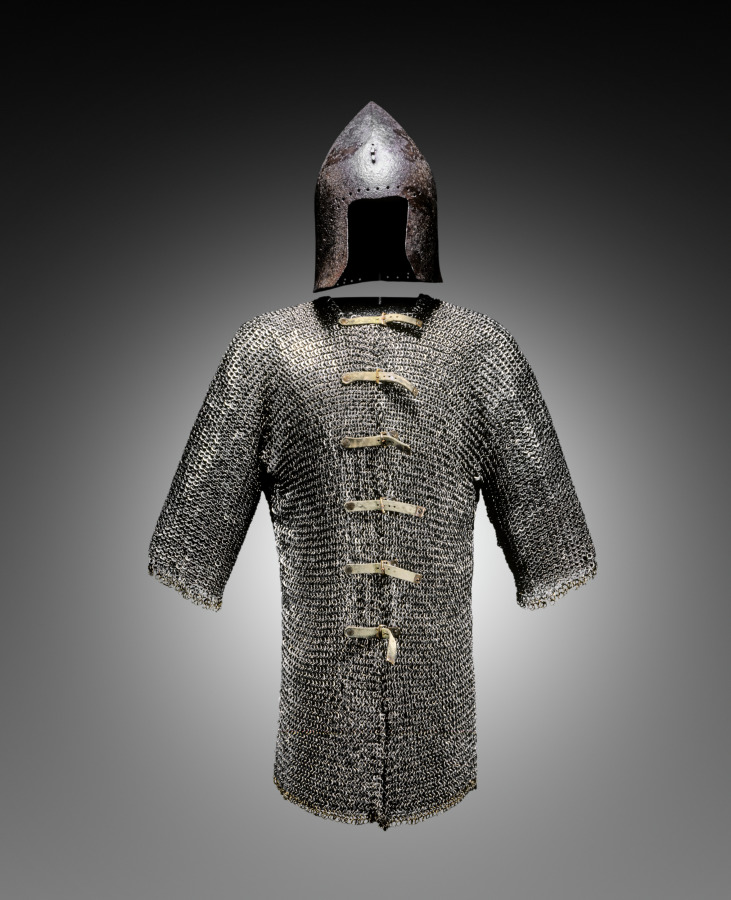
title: Barbute (from the Venetian Garrison at Chalcis)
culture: North Italy, 14th-15th century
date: c. 1350–1420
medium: iron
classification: Arms and Armor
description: This is a rare example of a type of helmet used from about 1350 to 1480. Its conical shape deflected glancing blows to the head. Italian chronicles refer to professional men-at-arms as barbuti. The word derives from the Italian barba, or beard, a reference to the hood of mail often attached to these early helmets. The row of small holes along the face opening and neck were for the attachment of the hood and lining.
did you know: This helmet and a number of others were apparently excavated from the Venetian garrison at Chalcis on the Greek island of Euboea.